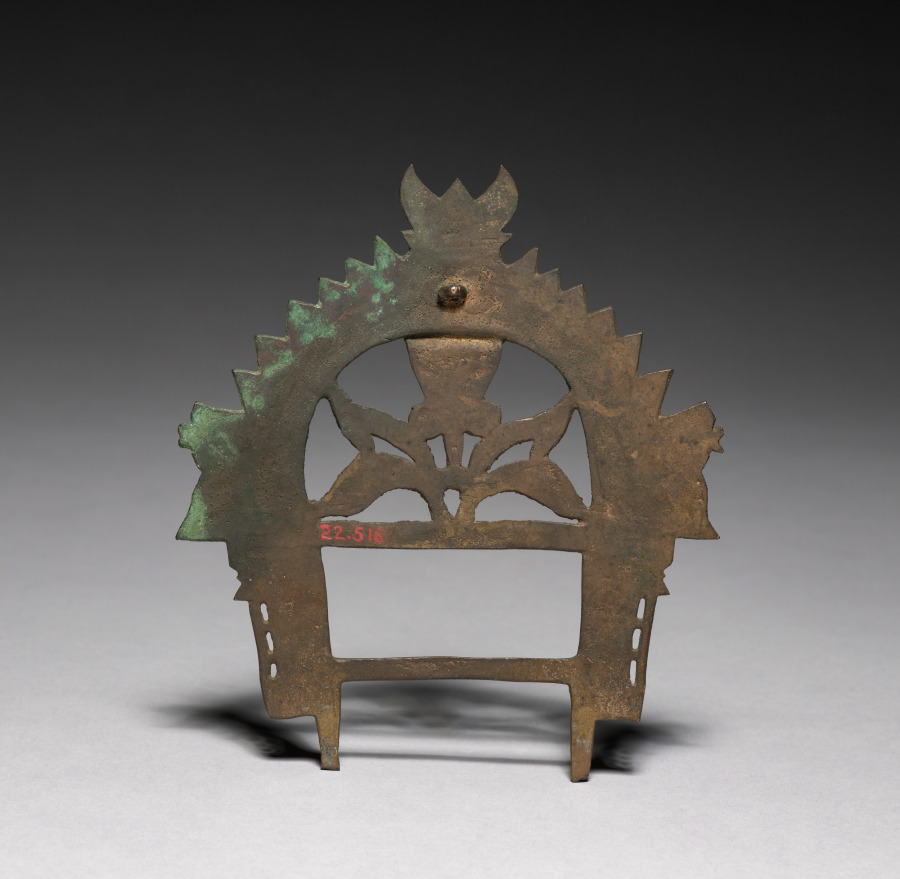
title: Aureole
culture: Burma, 19th century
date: 1800s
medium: brass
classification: Sculpture